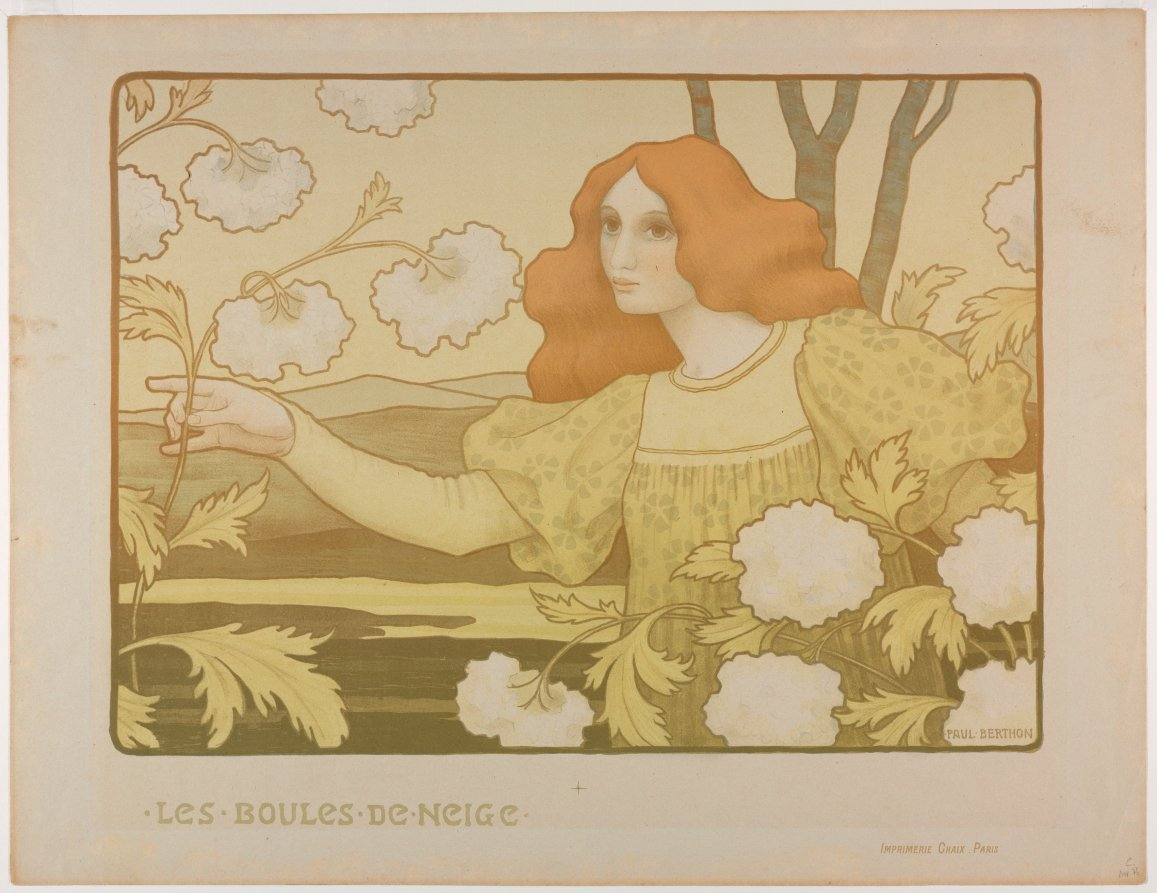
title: Snowballs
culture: France, late 19th century - early 20th century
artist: Paul Berthon (French, 1872–1909)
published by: Chaix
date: c. 1900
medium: color lithograph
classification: Print